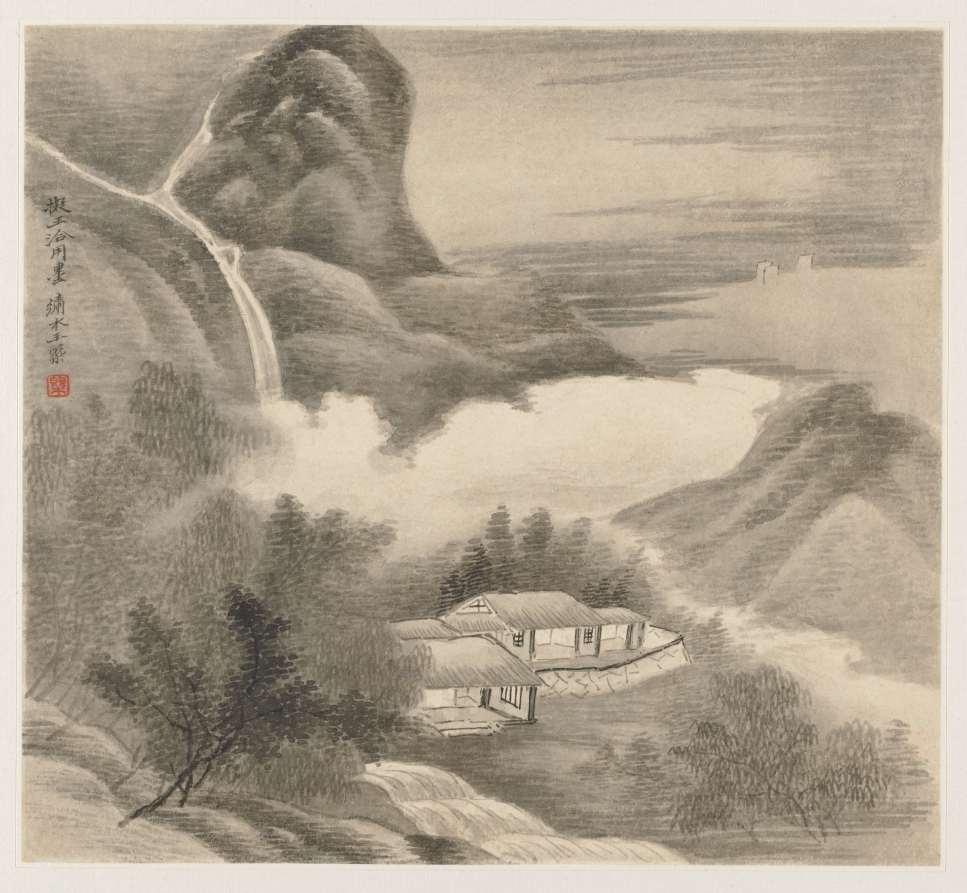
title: Album of Landscapes: Leaf 5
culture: China, Qing dynasty (1644-1911)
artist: Wang Gai (Chinese, active c. 1677–1705)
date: 1677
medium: album leaf, ink and light color on paper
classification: Painting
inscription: Artist's inscription, signature, and seal on leaf 5: In imitation of (T'ang) Wang Hsia's use of ink. Wang Gai of Hsiu-shui (seal) Gai Poem by Tai Wang-chin